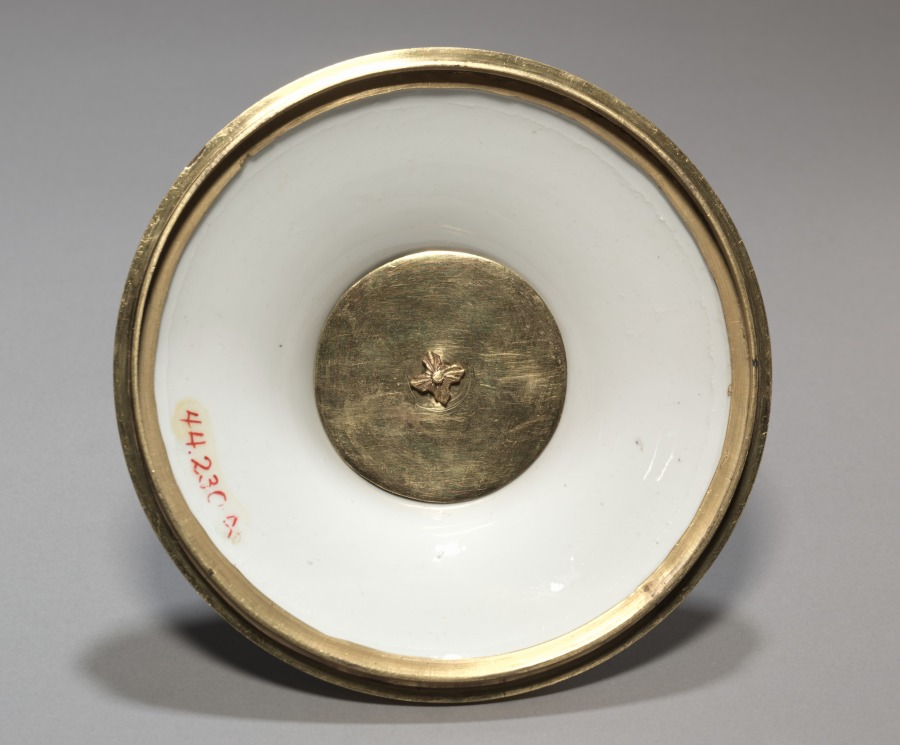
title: Cover for a Vase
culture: Germany, Meissen, 18th century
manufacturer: Meissen Porcelain Factory (German, est. c. 1710)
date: 1749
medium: porcelain mounted in gilt bronze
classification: Ceramic